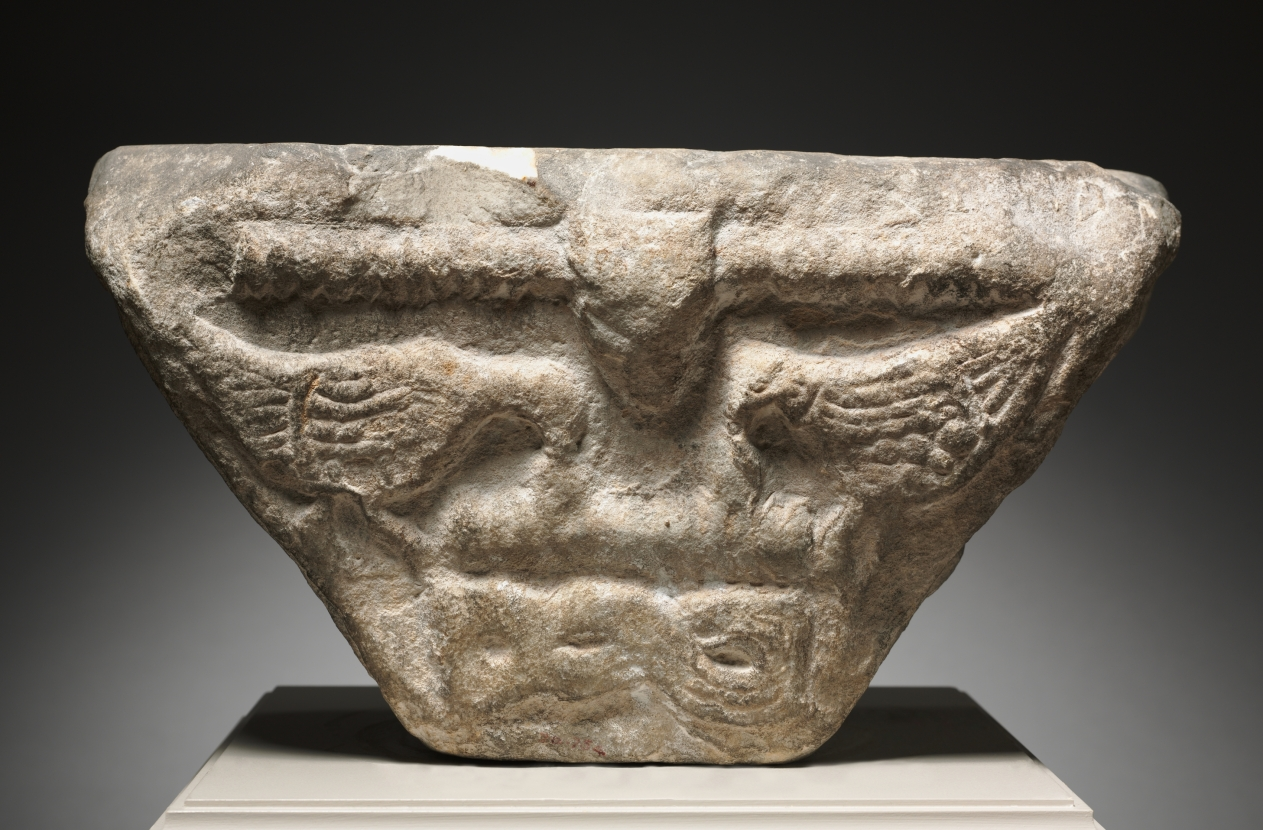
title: Capital with Birds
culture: Italy, Migration period, 8th-9th Century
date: 700s-800s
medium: marble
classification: Sculpture